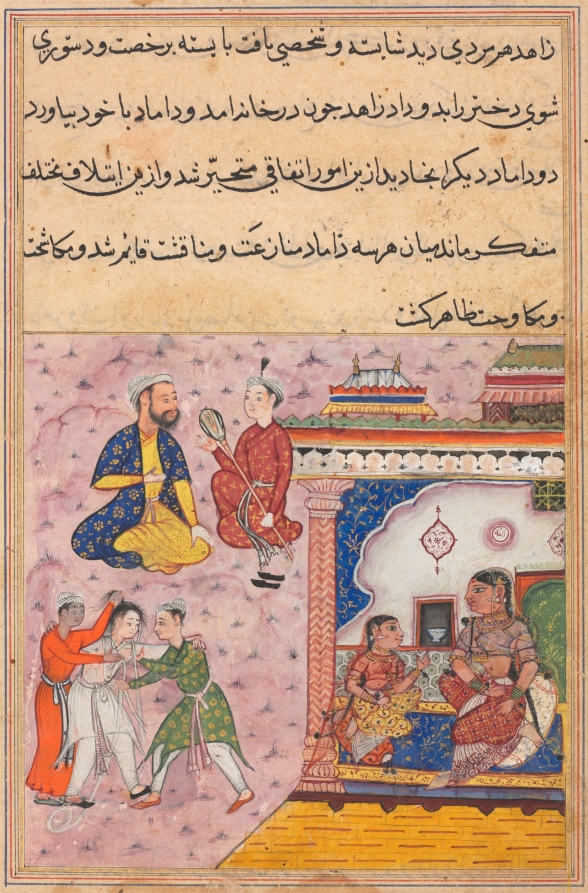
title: Three suitors fight amongst themselves for the hand of the devotee’s daughter, from a Tuti-nama (Tales of a Parrot): Twentieth Night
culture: Mughal India, court of Akbar (reigned 1556–1605)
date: c. 1560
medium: gum tempera, ink, and gold on paper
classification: Painting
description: In the foreground, three men brawl. Each was promised the hand of a religious man’s daughter, and each believed himself to be the worthiest suitor. The daughter, sitting in the chamber with her mother, is so upset by the conflict that she falls ill and appears to die. Her father, the devotee, sits in the background alongside his son.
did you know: Allah’s name is painted in a roundel on the wall, signaling the Muslim family’s devotion.